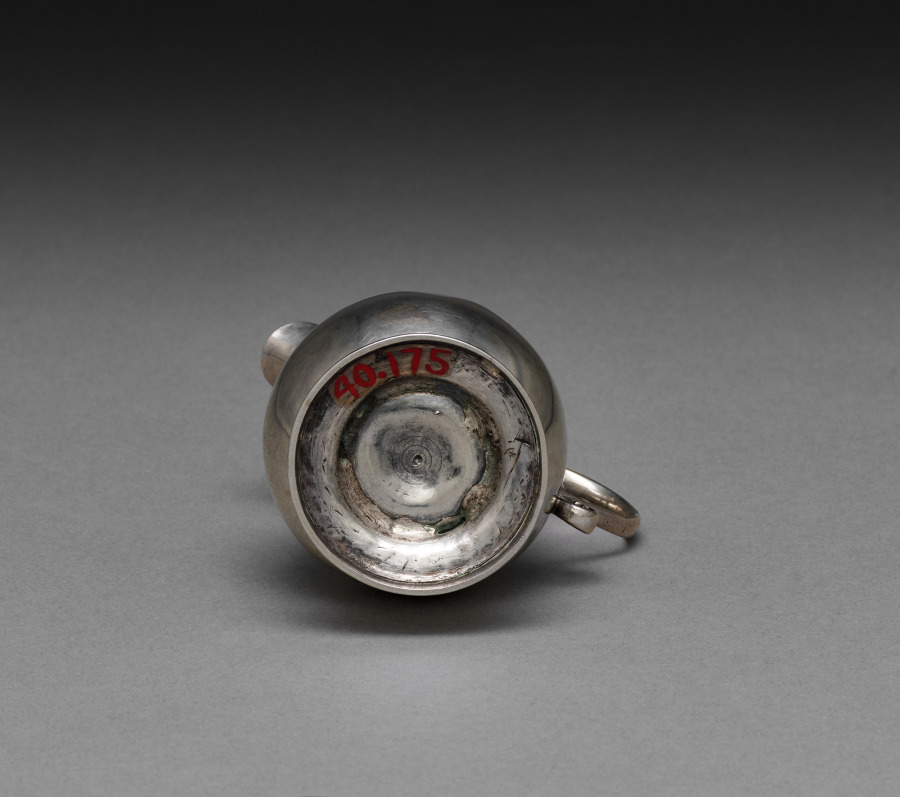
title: Cream Jug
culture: America, Massachusetts, Boston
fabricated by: John Coburn (American, 1725–1803)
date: c. 1745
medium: silver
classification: Silver